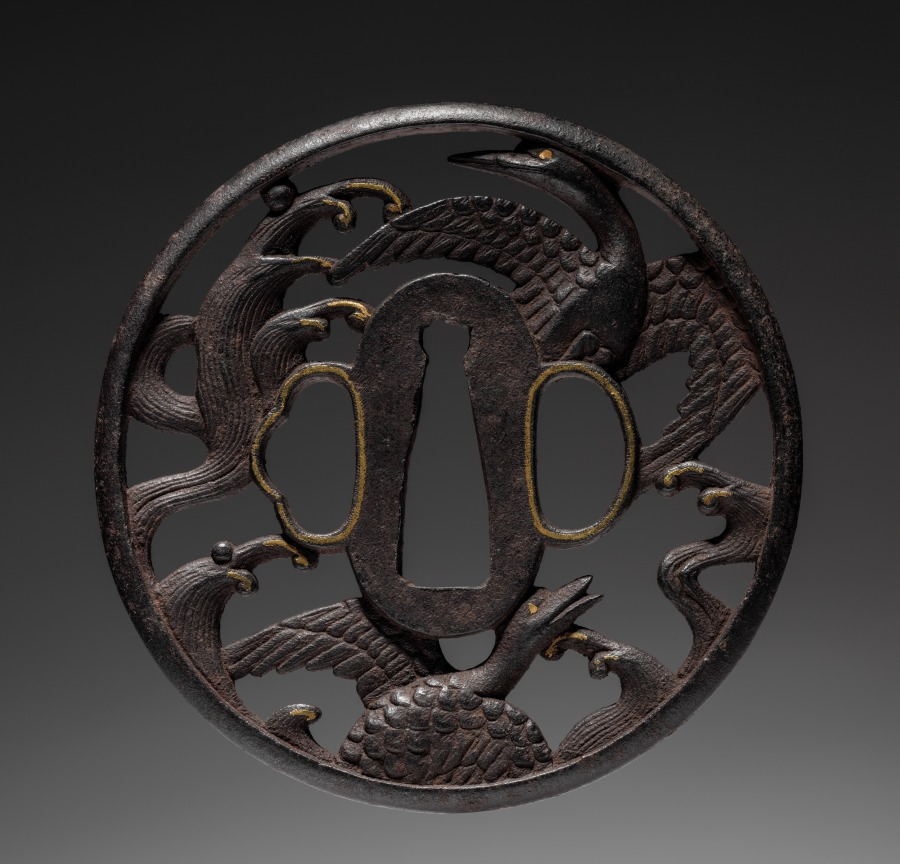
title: Sword Guard (Tsuba) with Geese and Waves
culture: Japan, possibly Edo period (1615-1868)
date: c. 1615–1868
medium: iron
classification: Arms and Armor